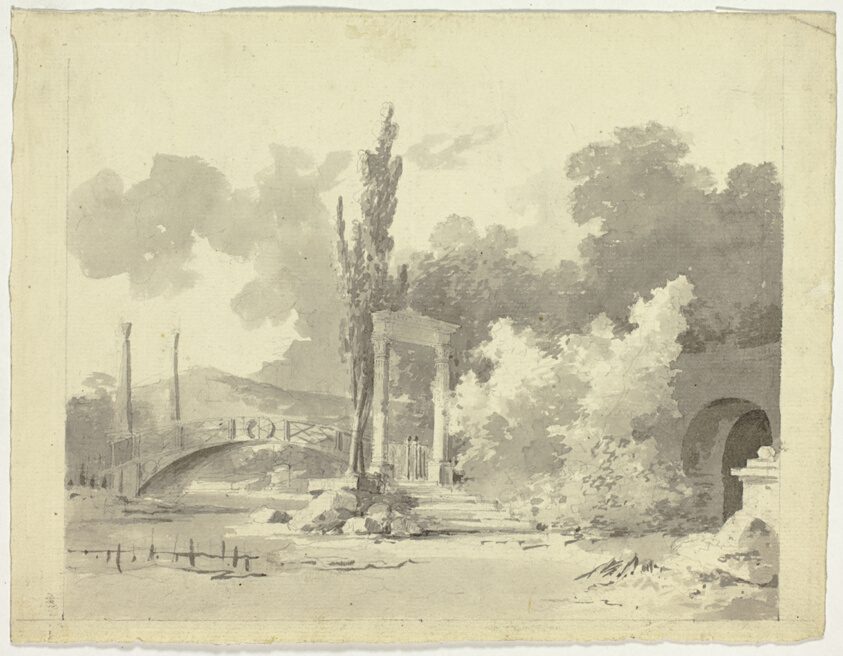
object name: Drawing and Watercolor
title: View of the Park at Versailles: Arched Bridge with Columned Approaches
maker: Pierre Antoine Mongin (French, 1761/62-1824/27)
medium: Brush and gray wash, with graphite, on cream laid paper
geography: France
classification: ink or chalk wash; drawings (visual works); prints and drawing